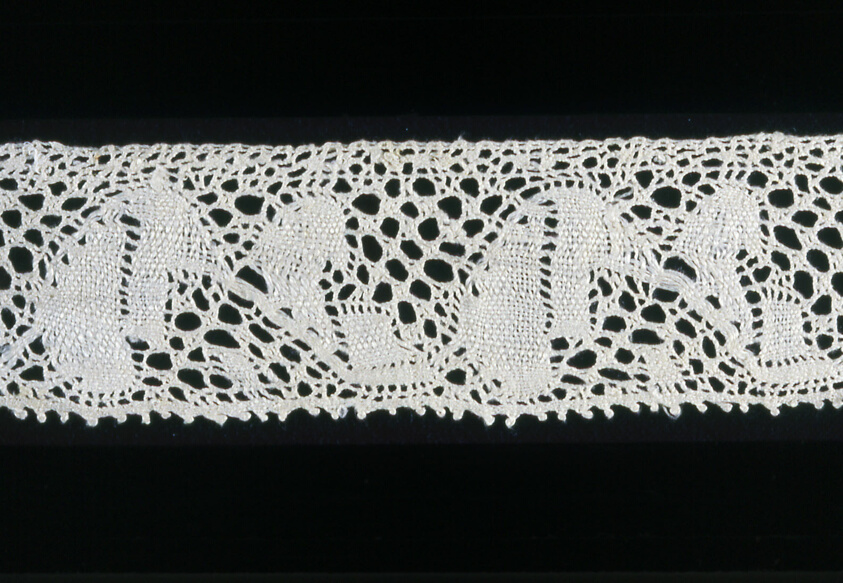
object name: Textile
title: Border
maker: Italy, probably Abruzzi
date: 1701/50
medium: Linen, bobbin straight lace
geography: Italy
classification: textile; lace - bobbin